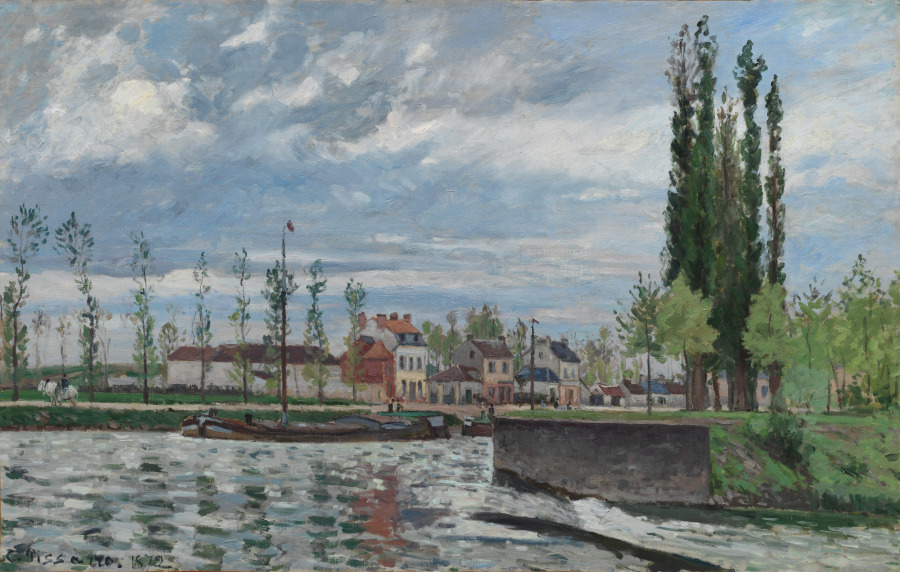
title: The Lock at Pontoise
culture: France, 19th century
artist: Camille Pissarro (French, 1830–1903)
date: 1872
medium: oil on fabric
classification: Painting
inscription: Signed lower left: C. Pissarro 1872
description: Pissarro was instrumental in developing the radically new Impressionist technique of painting quickly outdoors to capture fleeting effects of light and atmosphere. The rushing water and overcast sky in this view of a river lock near the artist’s home at Pontoise, a rural commune about 17 miles northwest of Paris, are rendered with rapid, broken brushstrokes of pure color. Painting directly on canvas without preliminary drawing, Pissarro may have executed this work in a single session. The shimmering surface of broken color conveys the sensation of natural, outdoor light.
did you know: The river portrayed here is 212 miles (341 km) long.